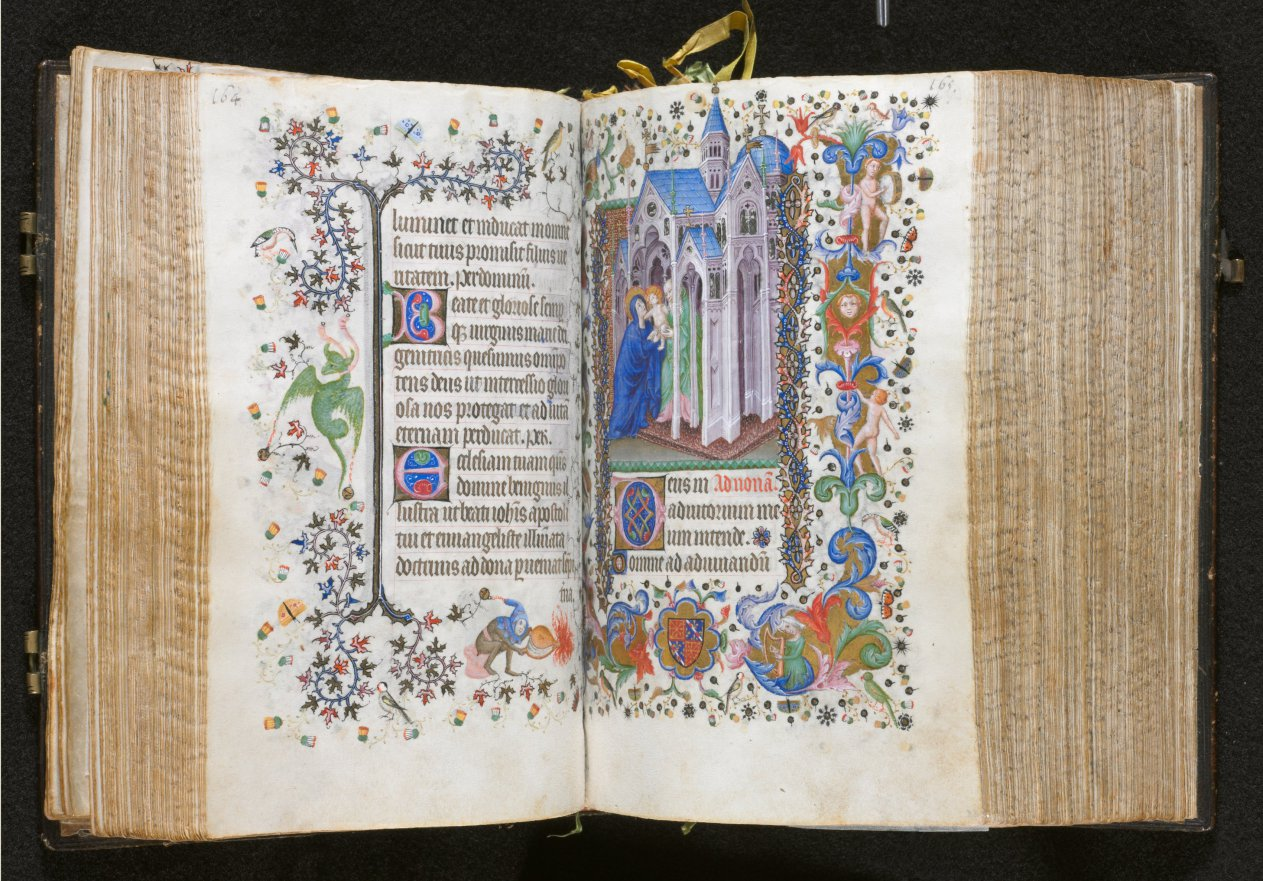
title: Hours of Charles the Noble, King of Navarre (1361-1425): fol. 82vr, Presentation in the Temple (Nones)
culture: France, Paris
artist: Master of the Brussels Initials and Associates (French)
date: c. 1405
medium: ink, tempera, and gold on vellum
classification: Bound Volume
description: This precious volume was obviously highly prized by its owner, the French-born King of Navarre, who had his coat of arms painted on no less than 20 folios. Rather than directly commissioning this manuscript from a specific workshop, it seems that Charles the Noble acquired his book of hours—perhaps ready-made for the luxury market—while on a trip to Paris in 1404–5. A collaborative effort, it contains six painting styles within its pages, those of two Italians, two Frenchmen, and two Netherlanders. The painter who was responsible for the planning and decoration of the book, and who produced 17 of the large miniatures, was a Bolognese artist known as the Master of the Brussels Initials. His principal assistant, responsible for most of the borders, was a Florentine who signed his name "Zecho" da Firenze on folio 208 verso.